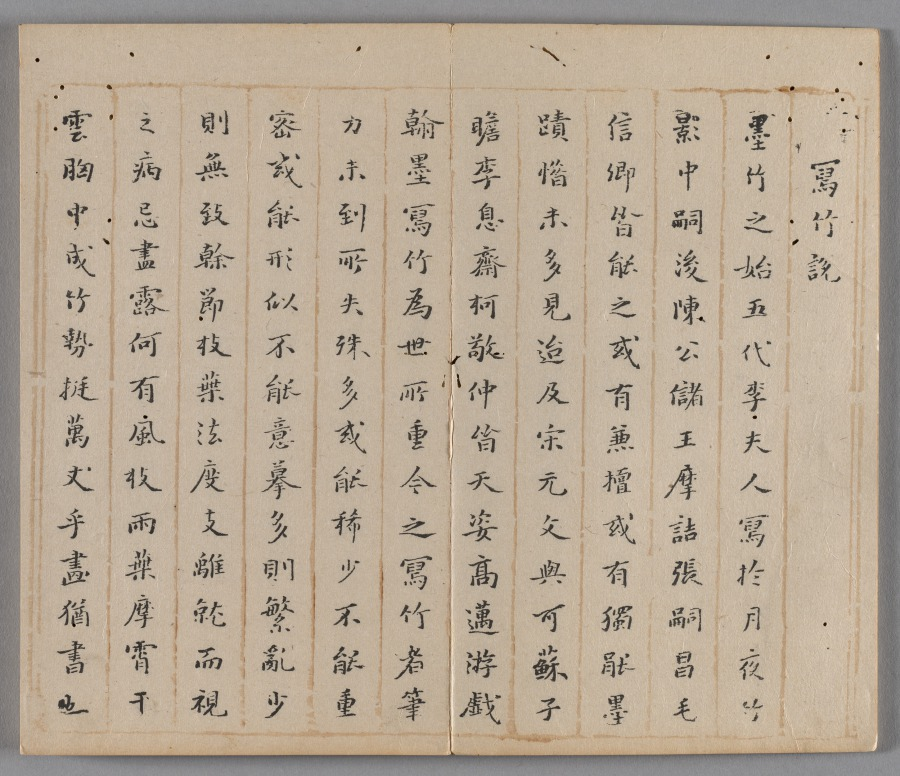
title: Ten Bamboo Studio Painting and Calligraphy Handbook (Shizhuzhai shuhua pu): Bamboo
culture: China, Qing dynasty (1644-1911)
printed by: Hu Zhengyan (Chinese, c. 1584–1674)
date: 1633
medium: Woodblock-printed book; ink and colors on paper; first edition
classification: Print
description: Color printing reached a level of perfection in the early 1600s, as seen in this Ten Bamboo Studio Collection of Calligraphy and Painting and the Mustard Seed Garden Manual of Painting (printed 1679 and 1701). The painterly quality, precision in registering (aligning) the woodblocks, and harmonious colors made them the most successful color print editions in Chinese history. Both editions were printed and compiled in Nanjing, spread nationwide, and had a great impact on the arts in Japan and Korea.